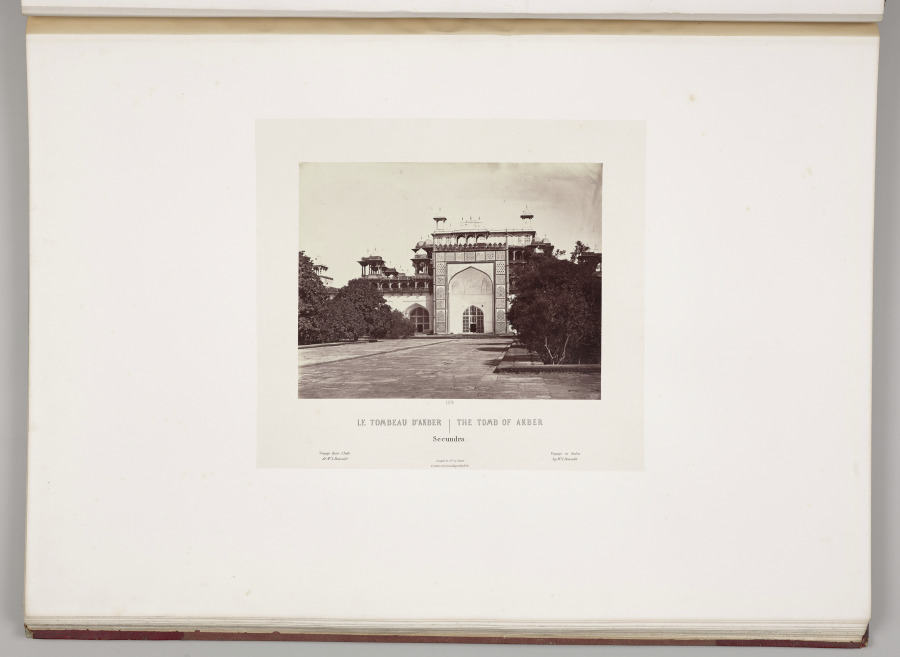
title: The Tomb of Akber, Secundra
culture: France, 19th century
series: India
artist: Louis-Théophile Marie Rousselet (French, 1845–1929)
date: 1865–68, published 1869–70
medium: Albumen print from glass plate negative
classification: Photograph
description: Concerned that his drawings did not do justice to the splendor of India’s monuments, Rousselet learned photography in India that year, a remarkable accomplishment. He proved to be a talented photographer with a sophisticated sense of composition. The scenes in this volume sweep across sites of Sultanate, Rajput, and Mughal power in northern India, from the sacred Hindu city of Varanasi on the Ganges River to Alwar in Rajasthan. Also included are several scenes of industry and portraits of Indian rulers.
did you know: Louis Rousselet described himself as a “scientific traveler” when he went to India alone at age 18 in 1863 and stayed into 1868.